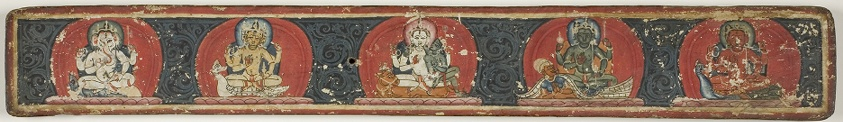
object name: Book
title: Hindu Manuscript Cover with Ganesha, Brahma, Shiva and Parvati, Vishnu, and Karttikeya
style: Himalayan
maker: Nepal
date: late 15th/early 16th century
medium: Pigments and metallic paint on wood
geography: Nepal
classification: wood; asian art; book